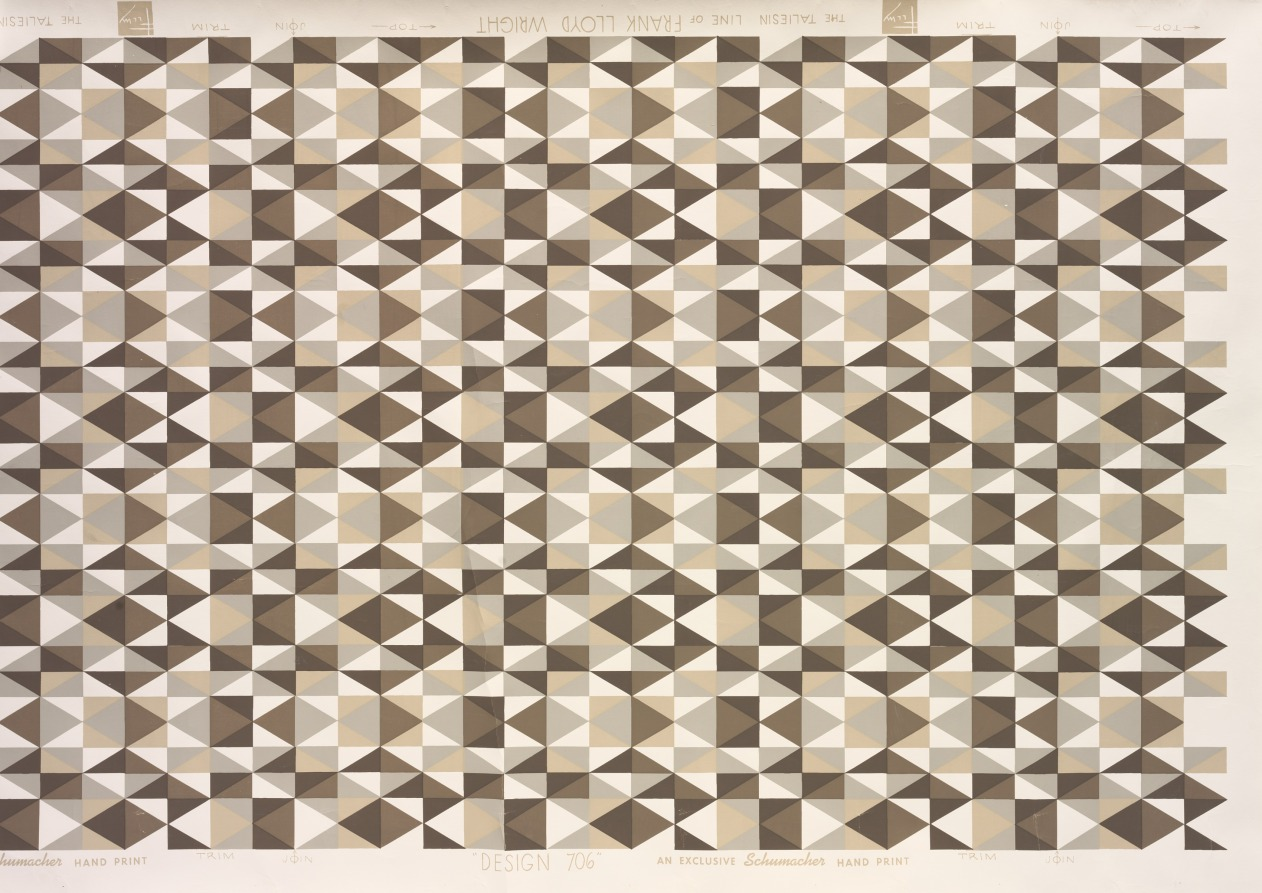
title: Design 706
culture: America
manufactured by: F. Schumacher and Co. (American)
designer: Frank Lloyd Wright (American, 1867–1959)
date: before 1959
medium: silkscreen on wallpaper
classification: Print